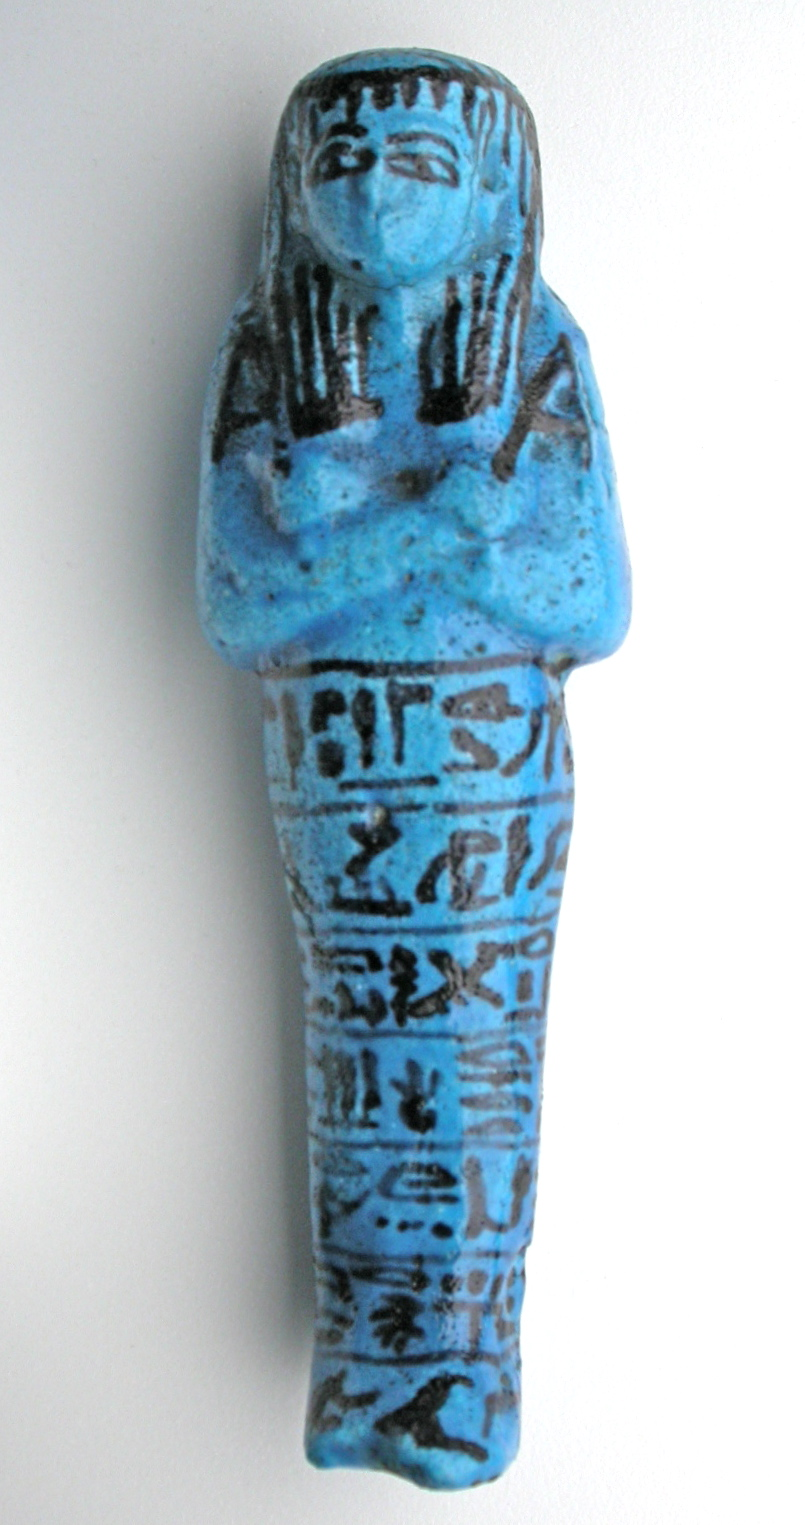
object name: Funerary Object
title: Shabti of Pinudjem II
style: egyptian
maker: Egyptian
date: Third Intermediate Period, Dynasty 21 (about 1069–945 BCE)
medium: Faience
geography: Egypt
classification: ushabti; ceramics; funerary; figurine; ancient art; faïence (composite material)